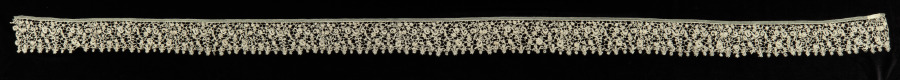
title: Lace Edging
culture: Italy, Venice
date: 1660–99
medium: Needle lace (Venetian Rose Point-Punto Rosallino)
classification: Lace